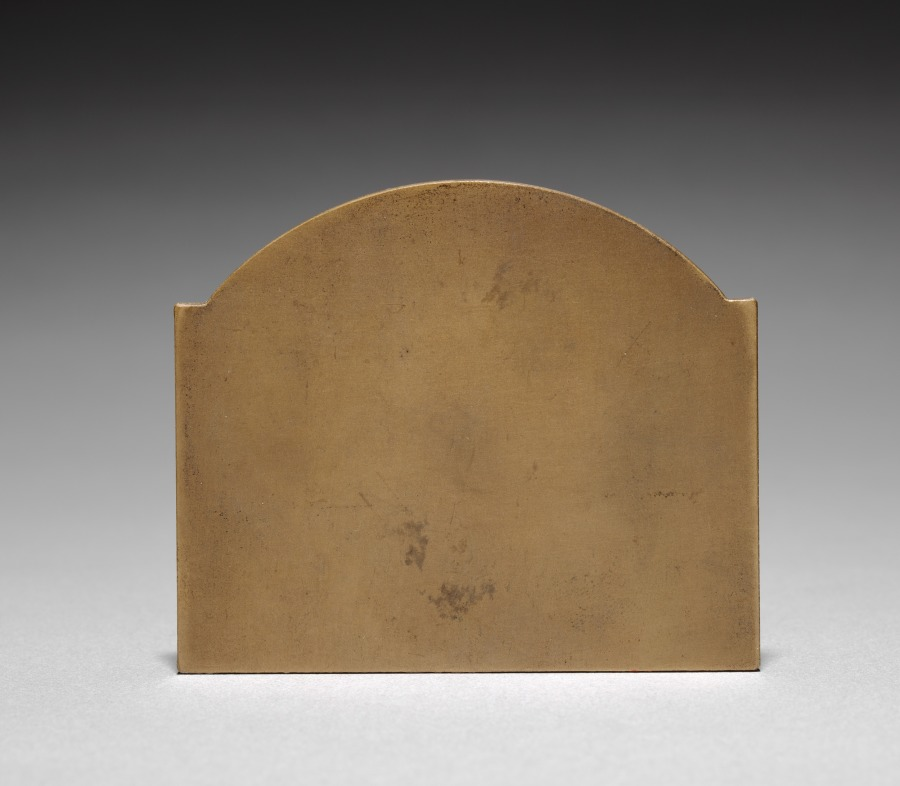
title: Medallion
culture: France, 19th-20th century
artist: Henri Emile Allouard (French, 1844–1929)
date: c.1915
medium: bronze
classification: Metalwork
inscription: "Pro Patria" (For our country); signed: "H. Allouard."